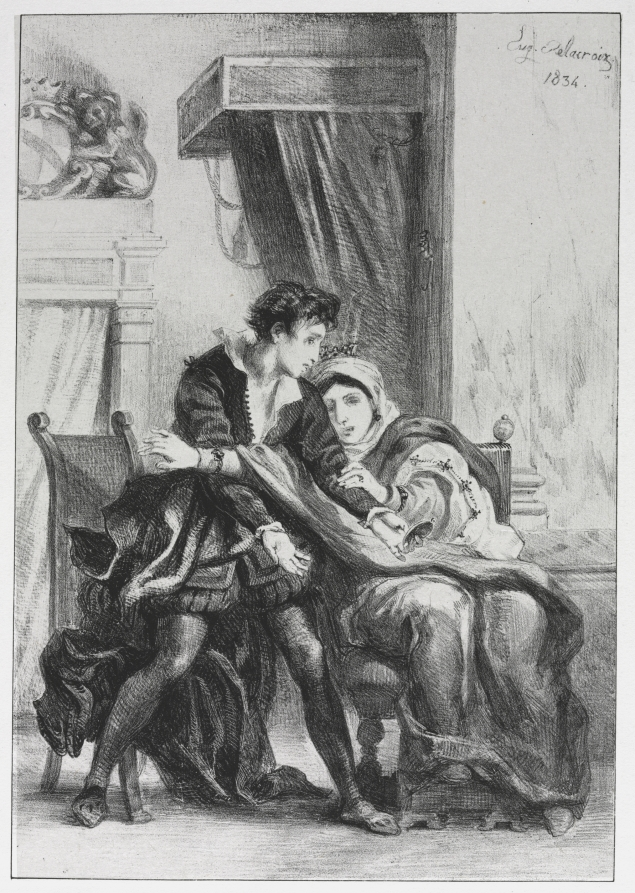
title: Hamlet: Hamlet and the Queen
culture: France, 19th century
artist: Eugène Delacroix (French, 1798–1863)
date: 1834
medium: lithograph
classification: Print